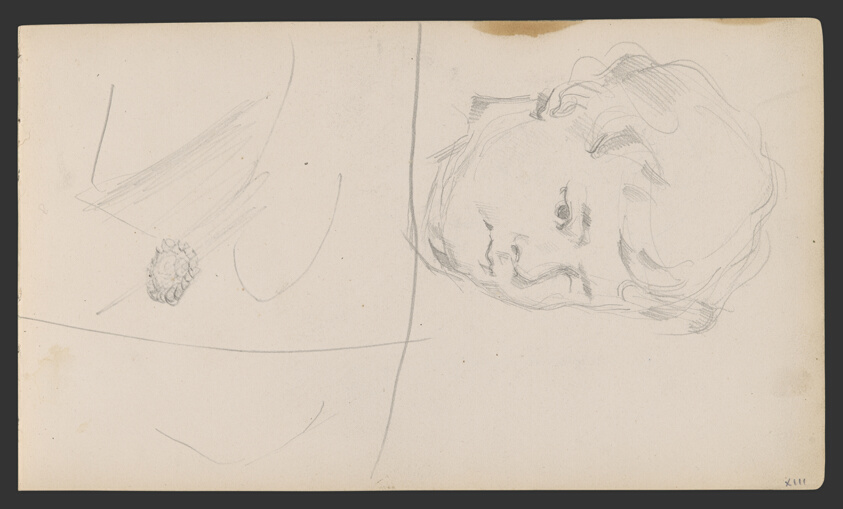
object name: Drawing and Watercolor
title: Sketchbook No. 2 (L'Estaque)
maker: Paul Cézanne; French, 1839-1906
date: 1875–86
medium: Graphite and pen and ink drawings on paper, bound into a book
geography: France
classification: sketchbook; graphite; prints and drawing; paper